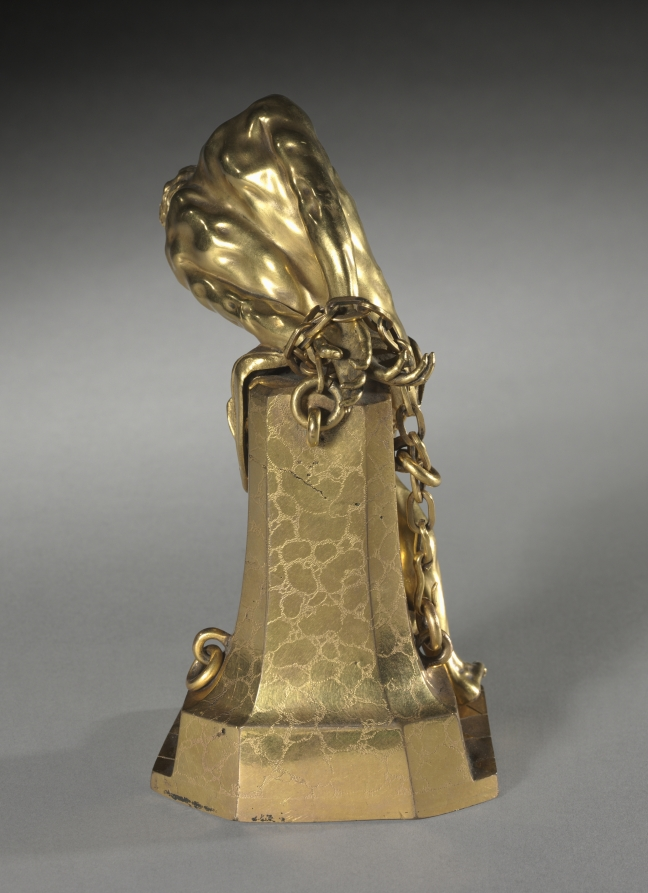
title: Christ at the Column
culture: Austria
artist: Johann Baptist Hagenauer (Austrian, 1732–1810)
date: 1756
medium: gilt bronze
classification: Sculpture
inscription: at base of stake: IOANNES HAGENAUER SALISBURGENSIS INVENIT ED FECIT 1756.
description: Considered to be one of the masterpieces of his youth, Hagenauer cast this bronze while a student at the Vienna Academy, where he studied between 1754 and 1759. The authorship and date is verified by an inscription found at the base of the stake: IOANNES HAGENAUER SALISBURGENSIS INVENIT ED FECIT 1756. This signature appears on several of Hagenauer's early works.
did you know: With the energy of the imbalanced composition, Hagenauer emphasizes this heightened moment of the Passion of Christ.